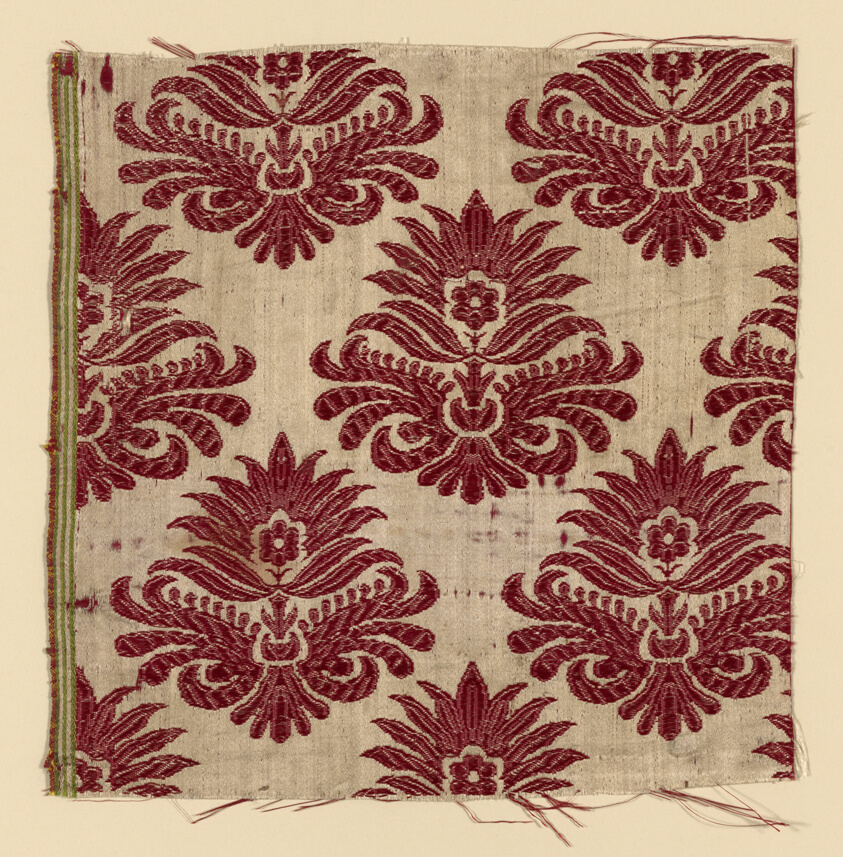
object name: Textile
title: Fragment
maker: Italy or Spain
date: 17th century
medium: Silk, warp-float faced satin weave self-patterned by areas of twill interlacing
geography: Spain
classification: textile; weaving